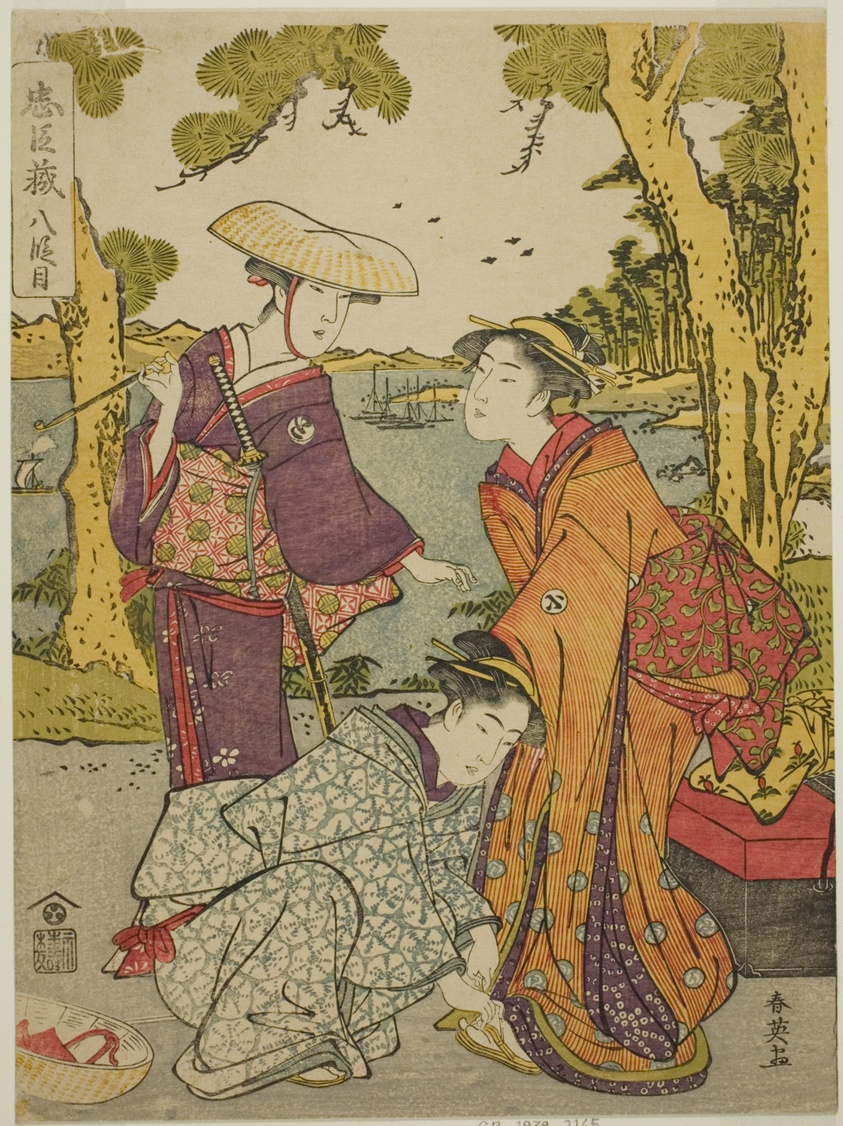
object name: Print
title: Act Eight: The Bridal Journey from the play Chushingura (Treasury of the Forty-seven Loyal Retainers)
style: Japanese (culture or style)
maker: Katsukawa Shun'ei (Japanese, 1762-1819)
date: early 1790s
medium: Color woodblock print; chuban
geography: Japan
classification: woodblock print; print; asian art